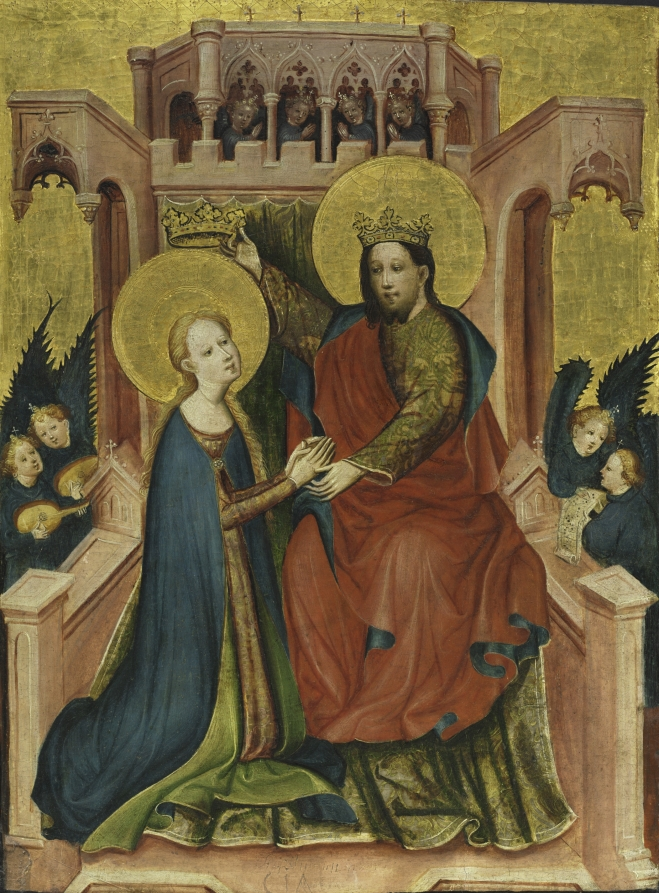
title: Coronation of the Virgin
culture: Germany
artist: Master of the Fröndenberg Altarpiece (German)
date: c. 1410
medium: tempera and gold on wood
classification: Painting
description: This panel once formed the left wing of an altarpiece originally located in a Cistercian convent in the German town of Fröndenberg. The Coronation of the Virgin was a common subject; though it is not based on a biblical text it often appeared in medieval books of hours as a focus of contemplation. It represents the culminating event in the life of Mary. Here, Christ and the Virgin are housed in an architectural setting; the Virgin kneels before Christ as he crowns her in the company of a group of angels. The color palette is particularly rich: pink, deep red, blue, and a delicate green as well as large areas of gold leaf. The well-developed, proportional figures, modeled drapery, and detailed architectural throne suggest an artist with a high level of experience and sophistication.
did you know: This is only one panel from what would have been a large altarpiece dedicated to the Virgin.